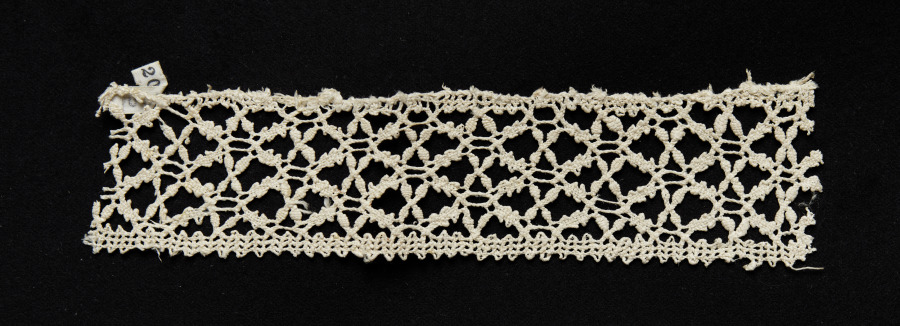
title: Lace Insertion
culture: Italy, Genoa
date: 1550–99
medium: Bobbin lace (needle lace, reticella design)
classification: Lace